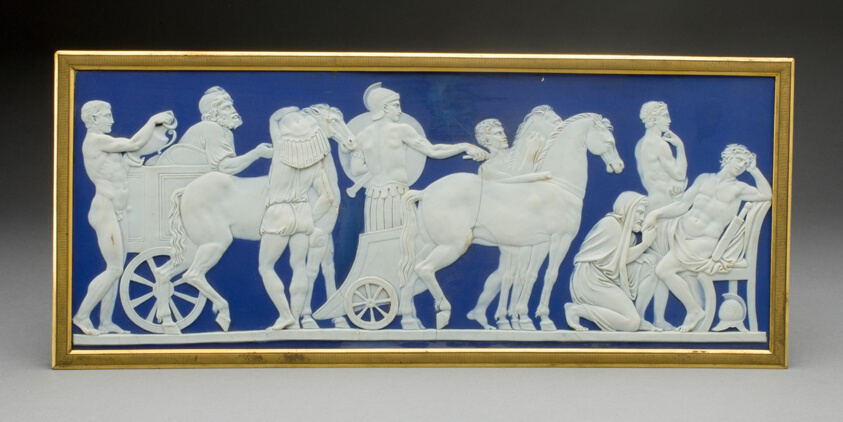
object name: Ceramics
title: Plaque with Priam and Achilles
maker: Wedgwood Manufactory (England, founded 1759)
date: c. 1790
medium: Stoneware (jasperware)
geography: Burslem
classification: sculpture; stoneware; european decorative arts; ceramics